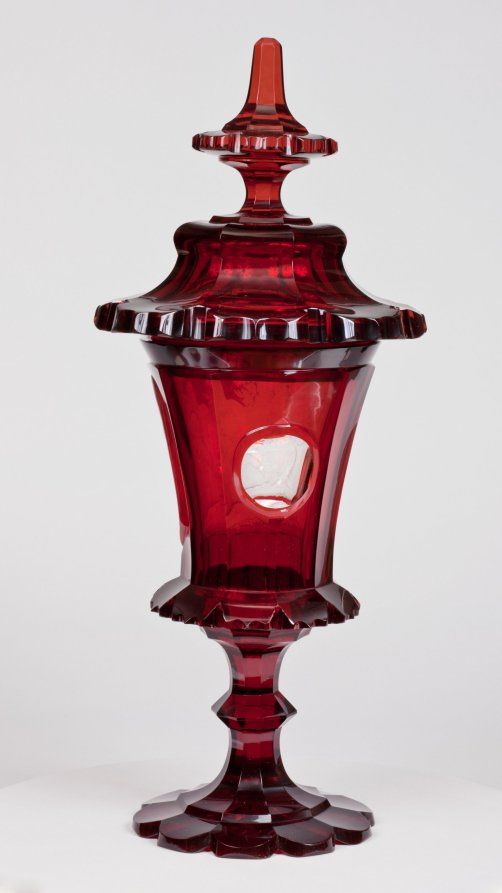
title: Covered Cup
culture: Bohemia, 19th century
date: mid-1800s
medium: ruby glass with engraved decoration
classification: Glass